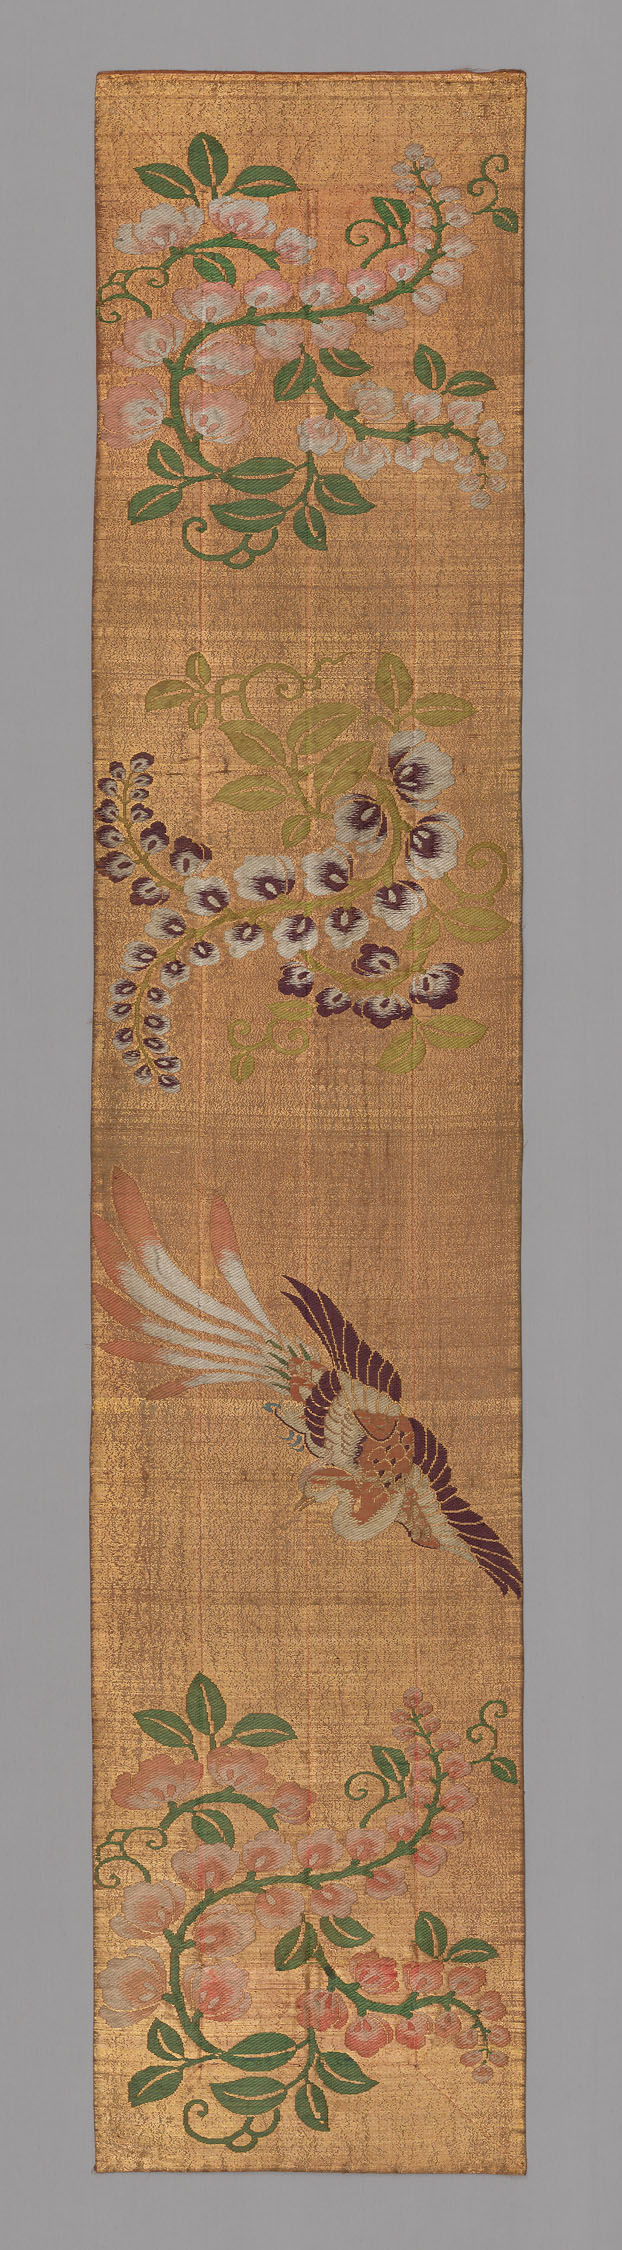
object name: Textile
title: Ôhi (Stole)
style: late edo, meiji, Japanism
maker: Japan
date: late Edo period (1789–1868)/ Meiji period (1868–1912), 19th century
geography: Japan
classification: textile; weaving